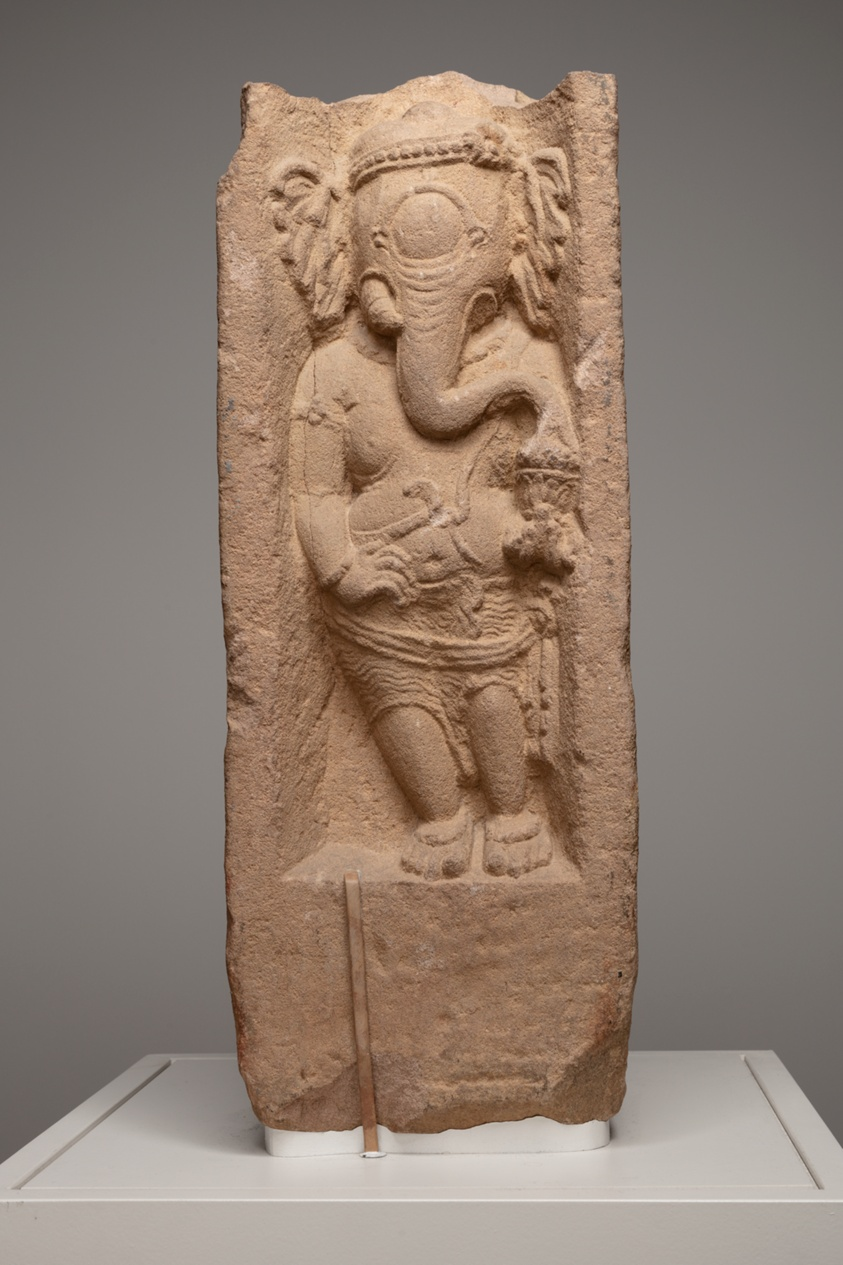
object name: Architectural fragment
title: Pillar Fragment with Gods Shiva and Ganesha and Goddesses Parvati and Durga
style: South Asian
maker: India; Madhya Pradesh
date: 8th/9th century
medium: Sandstone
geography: Madhya Pradesh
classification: stone; architectural fragment; asian art